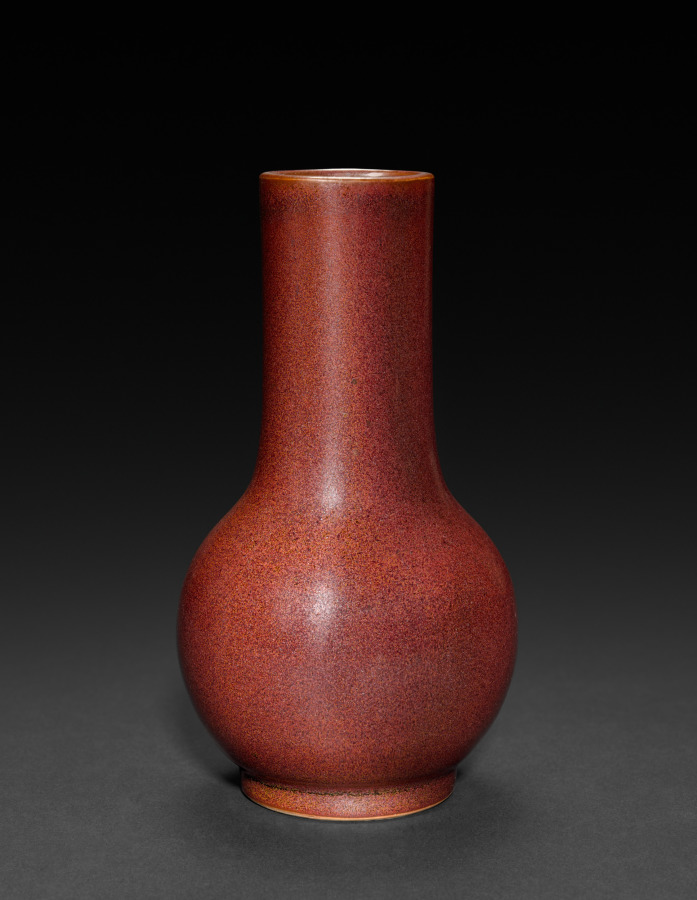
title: Bottle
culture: China, Qing dynasty (1644–1911), Qianlong reign (1736–95)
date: 1736–95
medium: porcelain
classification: Ceramic